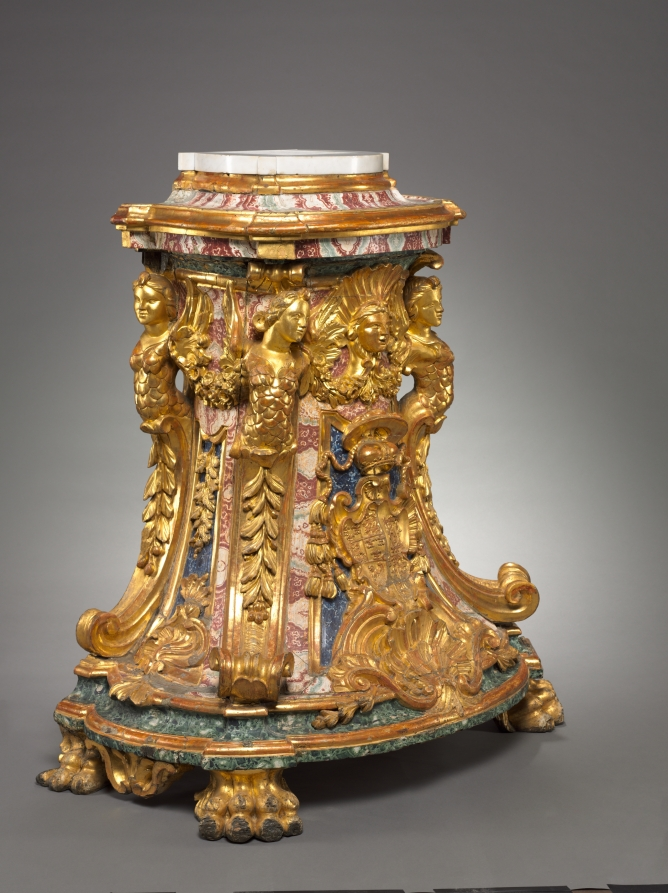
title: Pedestal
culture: Italy, Rome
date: mid-1700s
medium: carved, gilded, and painted wood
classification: Furniture and woodwork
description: The coat of arms on this pedestal is that of Cardinal York, the last of the Stuart pretenders to the British throne. He lived out his years in Rome, where he had been made a cardinal of the Church.